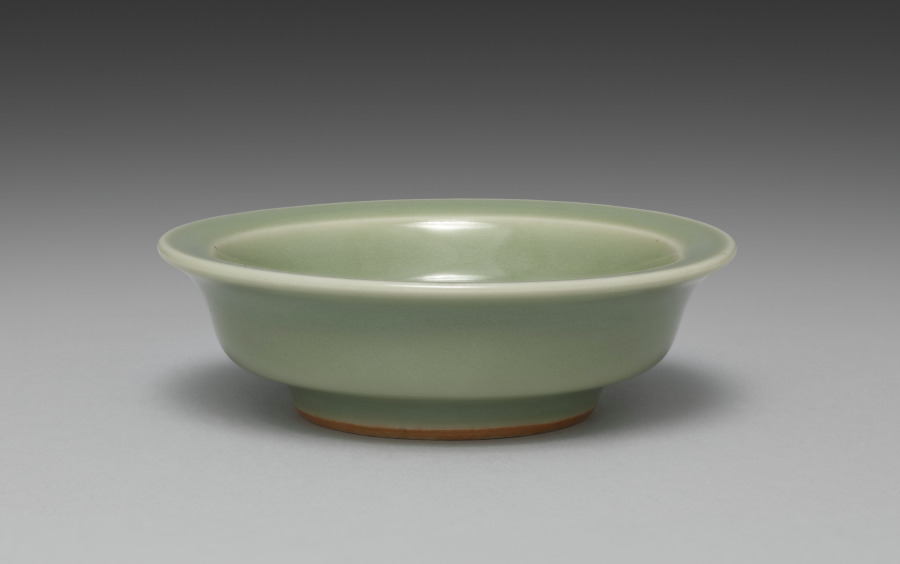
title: Saucer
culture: Japan, Meiji period (1868–1912)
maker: Seifū Yohei III (Japanese, 1851–1914)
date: 1893–1914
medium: One from a set of ten dishes; porcelain with green glaze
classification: Ceramic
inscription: 清風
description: Yohei III’s main output for his sophisticated clientele was in the form of tea sets and dining sets. He created a range of dishes in green glazes. He often produced in pairs, sets of five, or sets of ten. For this set of ten small dishes in a simple, round form that emphasizes the glaze above all, the box lid designates the piece as seiji, or green-glazed porcelain, using a general term for the extensive palette of green glazes often called celadon in English. The box lid further identifies the dishes themselves as tōchō, literally “bean-sized saucers,” a size that makes them suitable for dipping sauces.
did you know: The ten dishes in this set are stored in stacks of five in a two-compartment box.